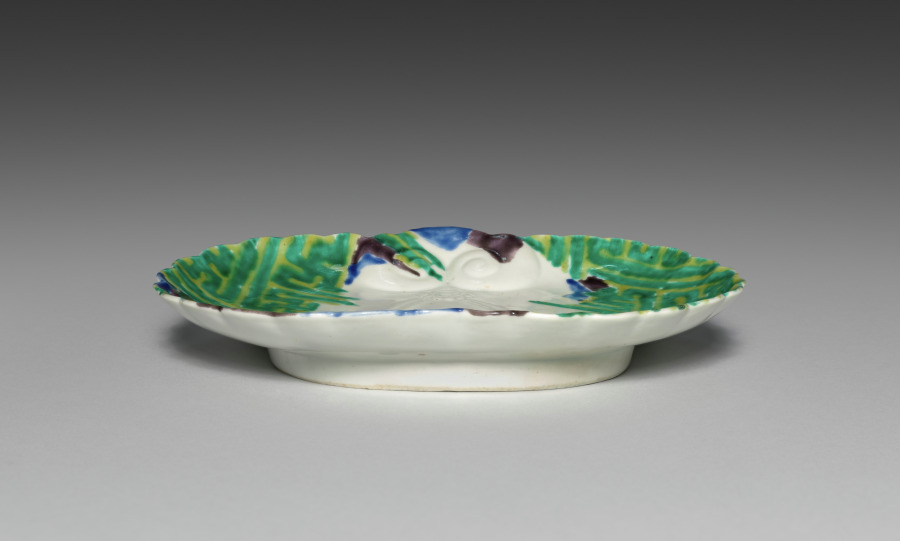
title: Ginkgo Leaf-Shaped Small Dish (Kozara) with Stylized Key-Fret Design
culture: Japan, Edo period (1615–1868)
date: mid-1600s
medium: Porcelain with molding and overglaze color enamel (Hizen ware, Matsugatani kilns, Nabeshima type)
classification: Ceramic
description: This dish combines a precisely molded shape with a freehand design in overglaze color enamels.